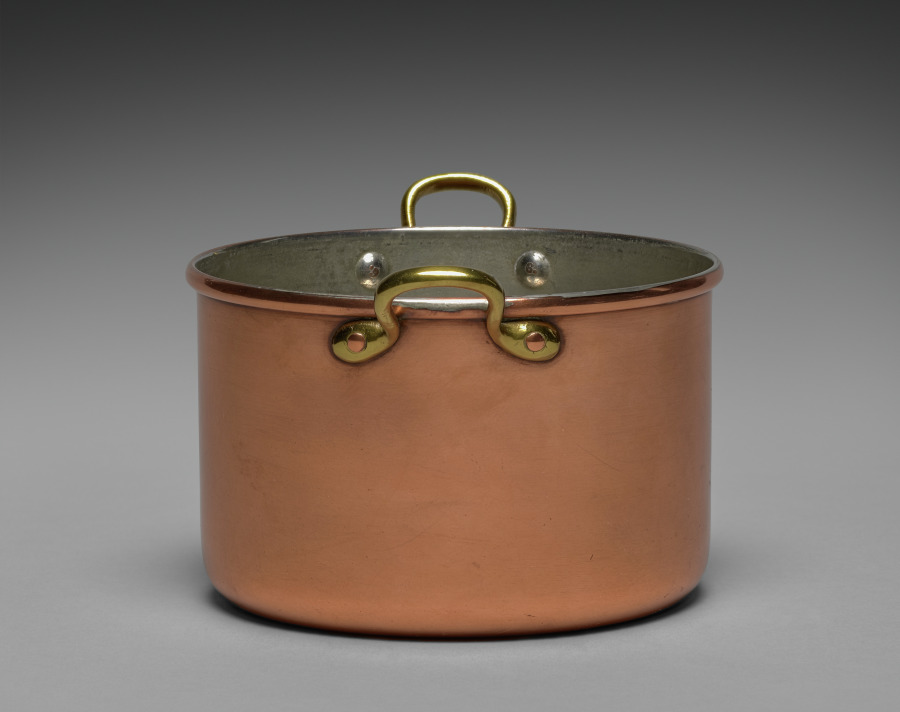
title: Pot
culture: Russia, St. Petersburg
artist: firm of Peter Carl Fabergé (Russian, 1846–1920)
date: 1914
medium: copper with brass handles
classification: Metalwork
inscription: inscribed: War (in Cyrillic), 1914r.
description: As Russia entered the First World War, austerity and economy settled into the fabric of life even among wealthy aristocrats and nobility. Not only were precious materials such as gold, silver, and gemstones hard to procure, but such luxury seemed out of place when so many men were dying at the front. Fabergé contributed to the war effort by making shells, casings, and other munitions out of brass and copper. He also made cookware, such as this small soup pot, to be sent to the front lines with provisions tucked inside. However, these simple forms only looked affordable. They were still a luxury only the wealthiest families could afford to send to their sons.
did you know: This copper soup pot was sent to the front lines filled with provisions during the First World War.